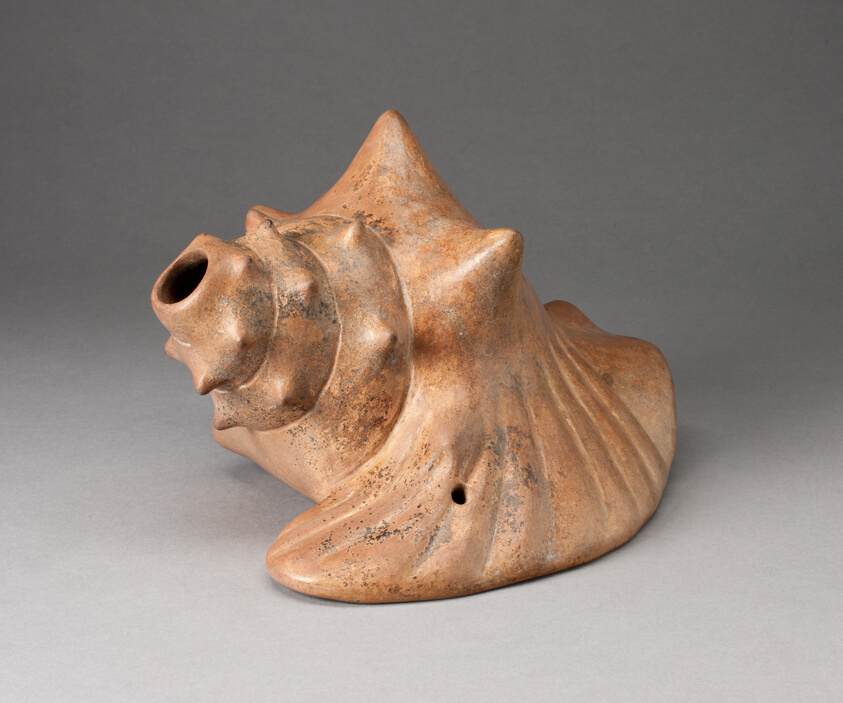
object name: Sculpture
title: Sculpture in the Form of a Conch Shell, Possibly a Trumpet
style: colima, mesoamerican, Pre-Columbian, americas, Arts of the Americas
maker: Colima (Colima, Mexico)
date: 200 BCE–200 CE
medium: Ceramic and pigment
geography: Western Mexico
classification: earthenware; ceramics; vessel; art of the americas; sculpture